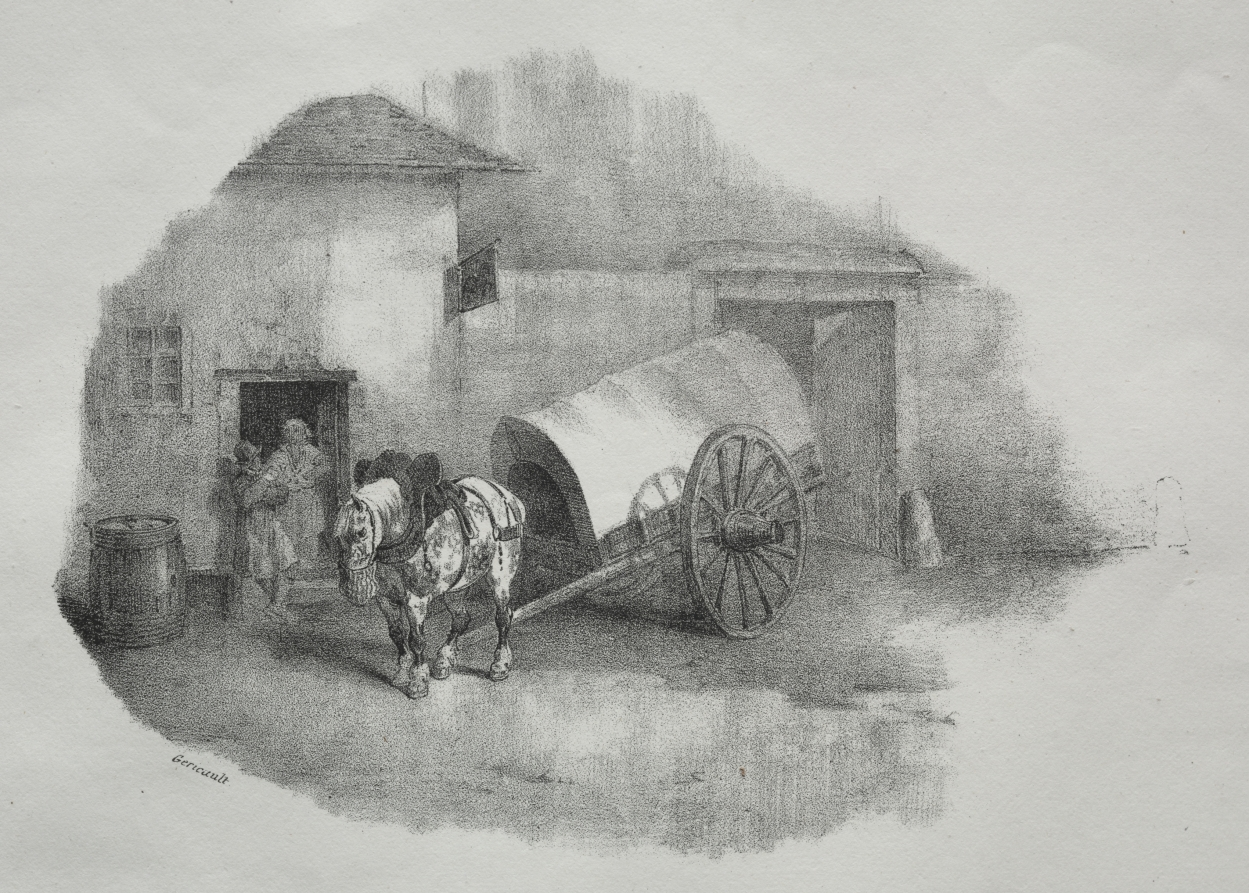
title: Cheval de charrette sorti des limons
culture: France, 19th century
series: Lithographic Studies of Horses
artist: Théodore Géricault (French, 1791–1824)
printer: Godefroy Engelmann (French, 1788–1839)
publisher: Gihaut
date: 1822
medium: lithograph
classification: Print